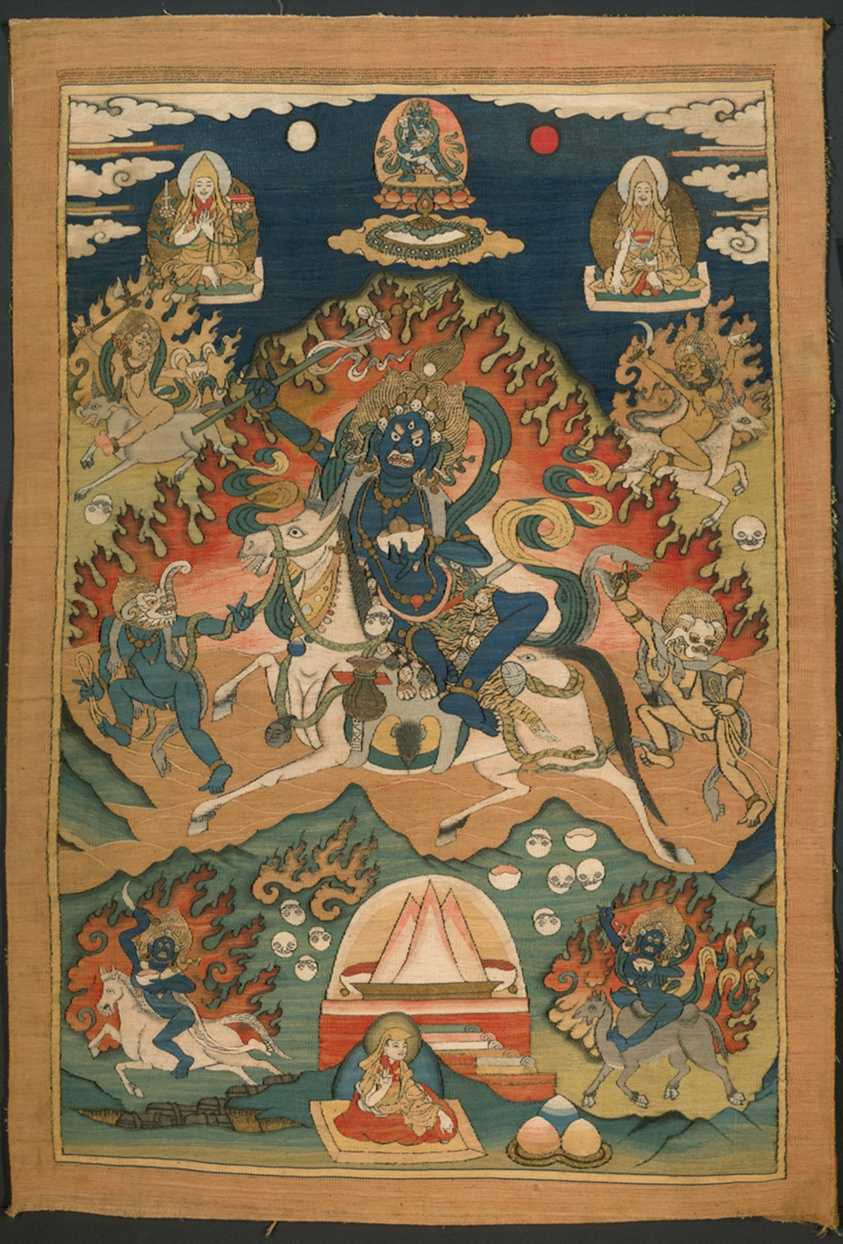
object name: Textile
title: Wrathful Form of the Goddess Saraswati (Magzor Gyalmo) or Palden Llamo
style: Himalayan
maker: Tibet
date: 20th century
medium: Silk tapestry (kesi)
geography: Tibet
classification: hanging scroll; painting; asian art; textile